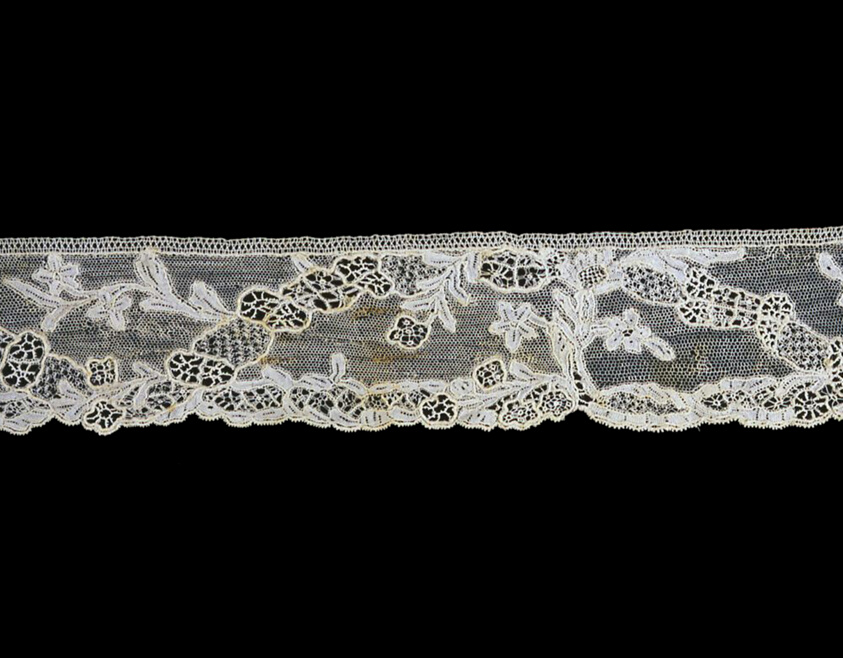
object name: Textile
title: Fragment (Border)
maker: Italy, Burano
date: 1760s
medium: Linen, needle lace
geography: Burano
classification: textile; lace - needle